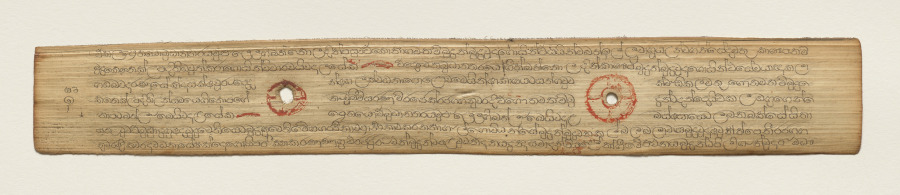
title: Leaf from a Buddhist Manuscript (recto)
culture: Sri Lanka, Singhalese, Late 17th century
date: c. 1700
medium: fiber paper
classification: Manuscript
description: Palm leaf material is still used for manuscripts in Sri Lanka. The palm leaves are prepared first by boiling them, drying them in the sun, and then rubbing them with oils. Scribes then use a metal stylus to incise the text. Then charcoal powder is wiped across the pages, filling in only the inscribed lines.